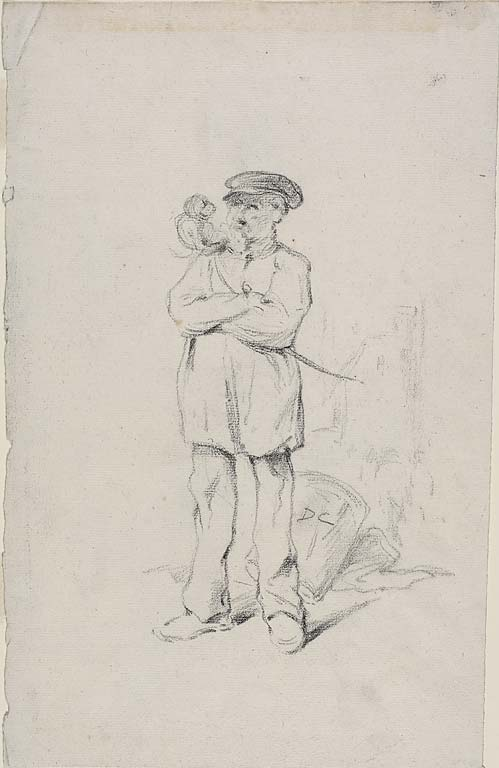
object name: Drawing and Watercolor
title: Sailor with a Monkey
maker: Attributed to Alexandre Gabriel Decamps; French, 1803-1860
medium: Black chalk on ivory laid paper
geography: France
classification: chalk; drawings (visual works); prints and drawing